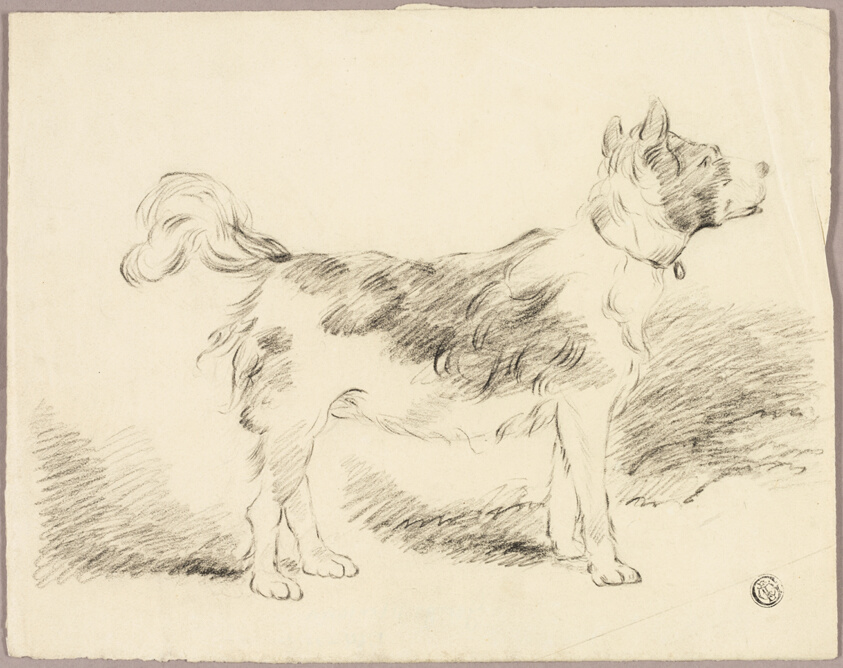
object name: Drawing and Watercolor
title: Shepherd Dog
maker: After George Morland; English, 1763-1804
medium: Black chalk on cream wove paper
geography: England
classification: chalk; drawings (visual works); prints and drawing